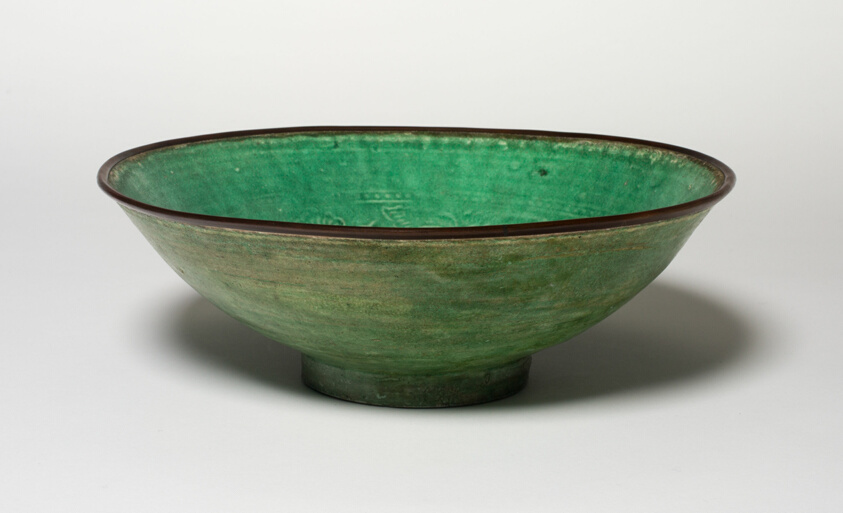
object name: Vessel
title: Bowl with Floral Scrolls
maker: China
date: Song dynasty (960–1279)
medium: Stoneware with green glaze and metal rim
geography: China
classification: stoneware; asian art; ceramics